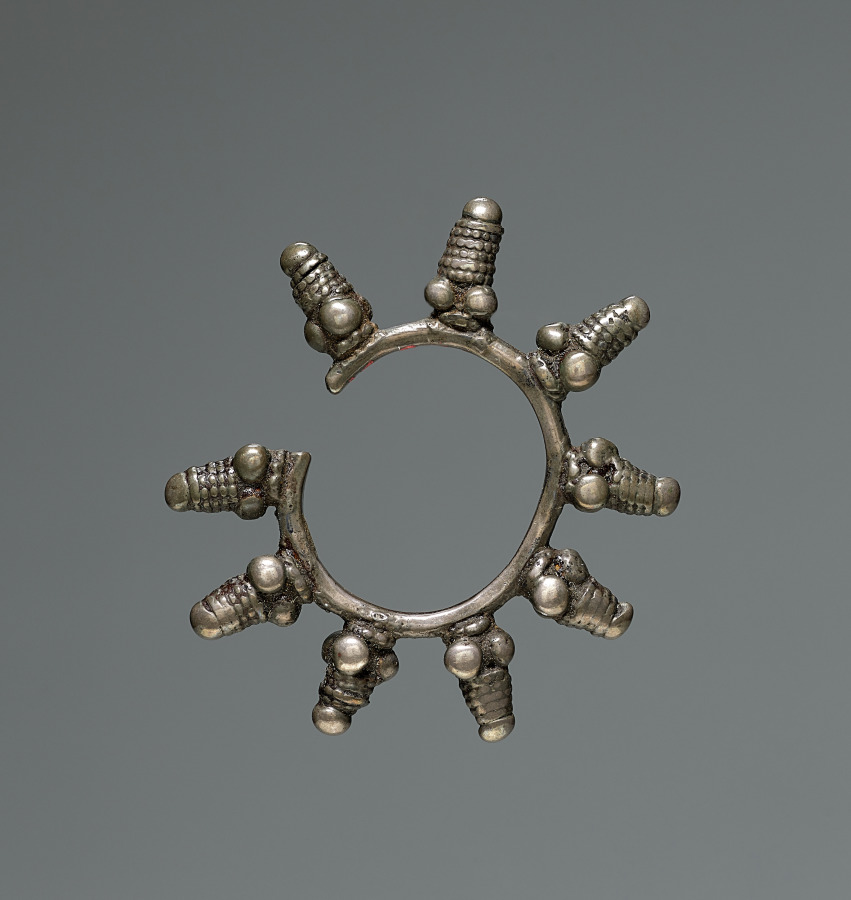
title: Earring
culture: India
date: 1800s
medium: silver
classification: Jewelry